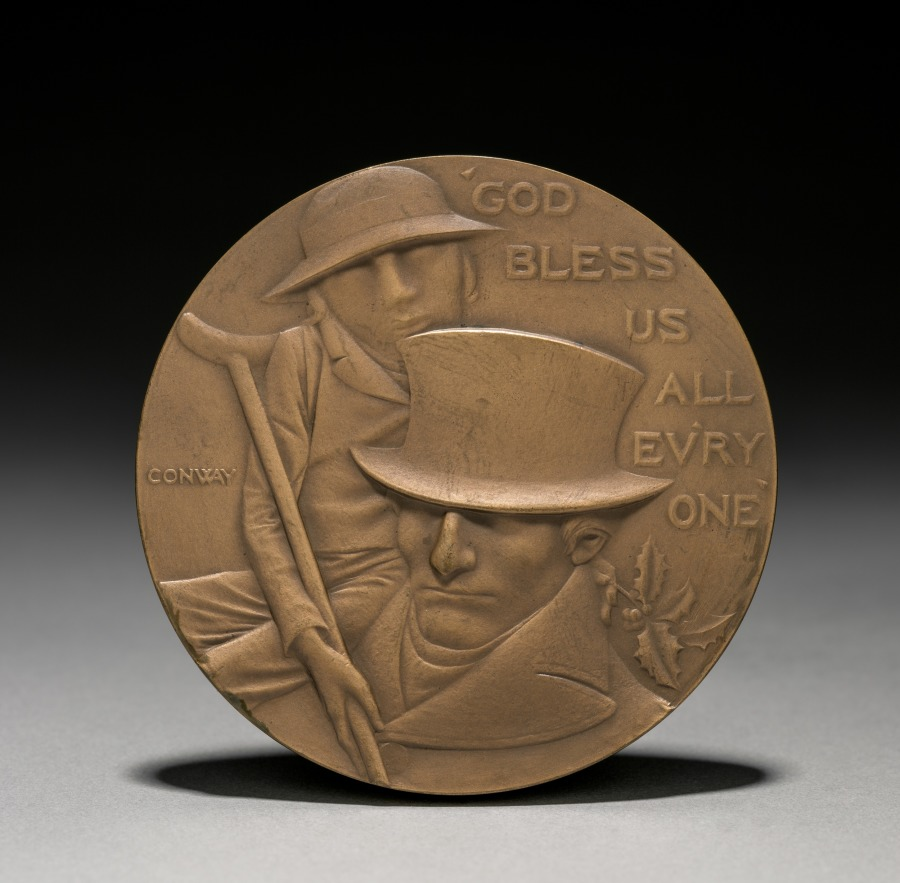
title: Medal: Charles Dickens (reverse)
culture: America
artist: John Severinus Conway (American, 1852–1925)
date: 1912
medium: bronze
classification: Metalwork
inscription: "GOD BLESS US ALL EV'RY ONE"; left-hand side, center: "CONWAY."